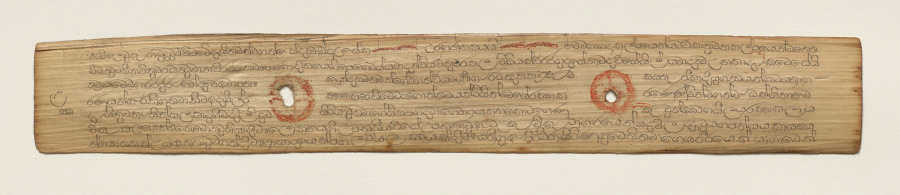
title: Leaf from a Buddhist Manuscript (recto)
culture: Sri Lanka, Singhalese, Late 17th century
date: c. 1700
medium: fiber paper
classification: Manuscript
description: Palm leaf material is still used for manuscripts in Sri Lanka. The palm leaves are prepared first by boiling them, drying them in the sun, and then rubbing them with oils. Scribes then use a metal stylus to incise the text. Then charcoal powder is wiped across the pages, filling in only the inscribed lines.